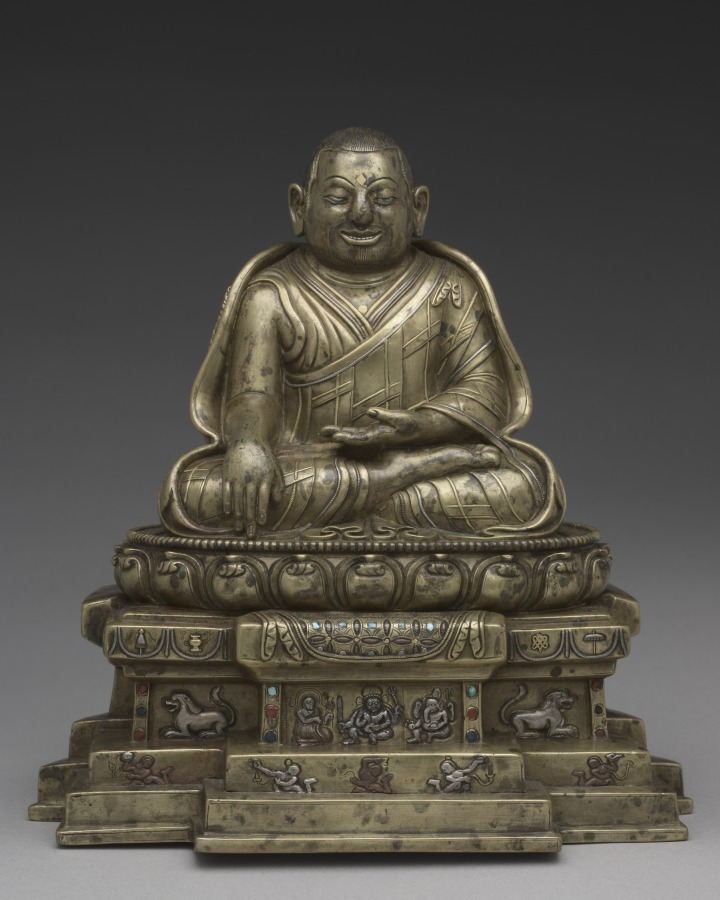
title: Portrait of Phagmo Drupa Dorje Gyalpo (1110–1170)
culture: Central Tibet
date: 1200s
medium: gilt bronze with gold, silver, copper, turquoise, lapis, and coral inlay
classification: Sculpture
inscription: / / Na mo 'ghu ru / / Ngan lam ban chung bdag gis ni / / bla ma Rin chen sku bzhengs pa yi / / bsod nams 'di yi byin brlabs kyis / / 'gro drug sdug sngal zad par shog / / Translation: "Salutations to the master ! May the sufferings of the six kinds of beings be appeased through the blessing of merit gained by me, the little monk of Ngan.lam, in having this statue of the Lama Rin.chen made."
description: This portrait statue depicts the first monastic leader of the prominent Buddhist monastery of Densatil, an influential early leader of the Tibetan Buddhist monastic order called Kagyu, famous for his views on the importance of meditation. He sits on a lotus pedestal and lion throne, like a Buddha, and his hand positions (mudras) communicate that meditation leads to enlightenment.